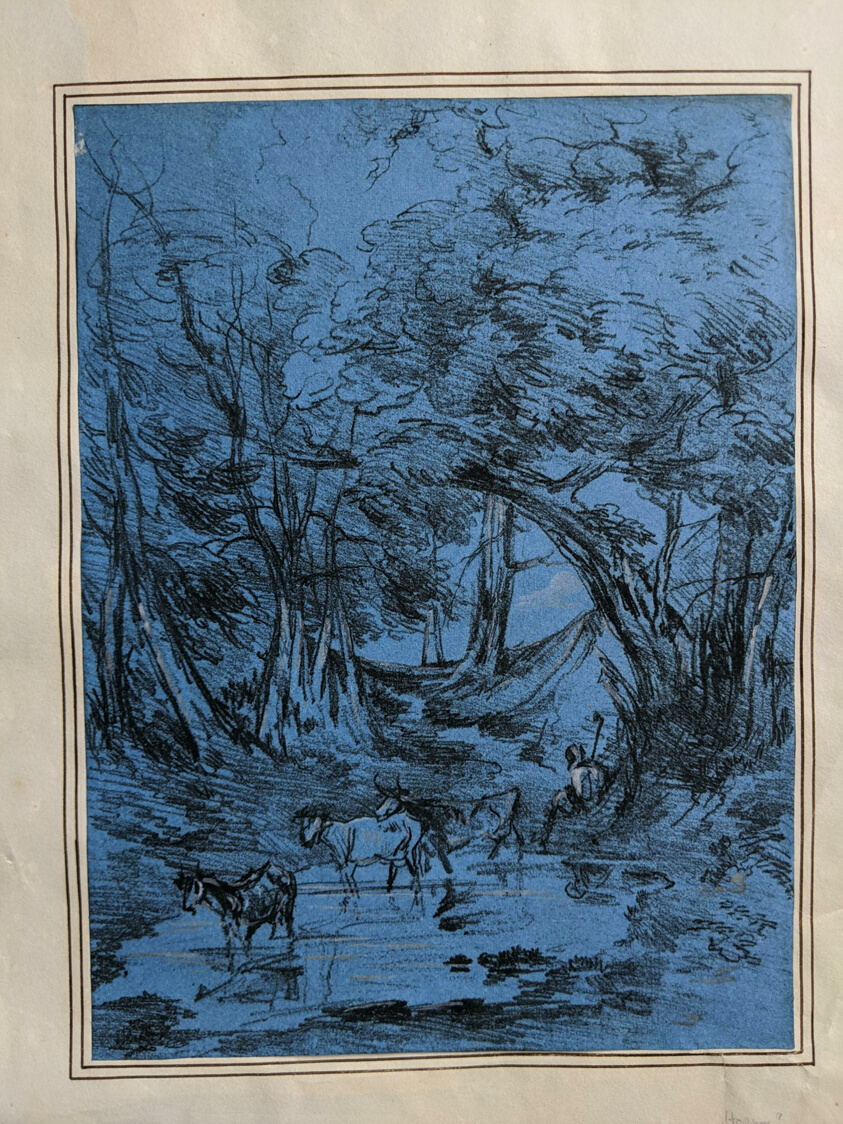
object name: Print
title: Studies of Landscapes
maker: François-Thomas-Louis Francia (French, 1772–1839); after various English artists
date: 1810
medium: 46 soft ground etchings in black, some heightened with wash, on ivory, blue, and buff wove papers, mounted onto 39 sheets of cream wove paper, ruled with pen and brown ink (with 5 unrelated prints)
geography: France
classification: prints and drawing; paper; print; etching